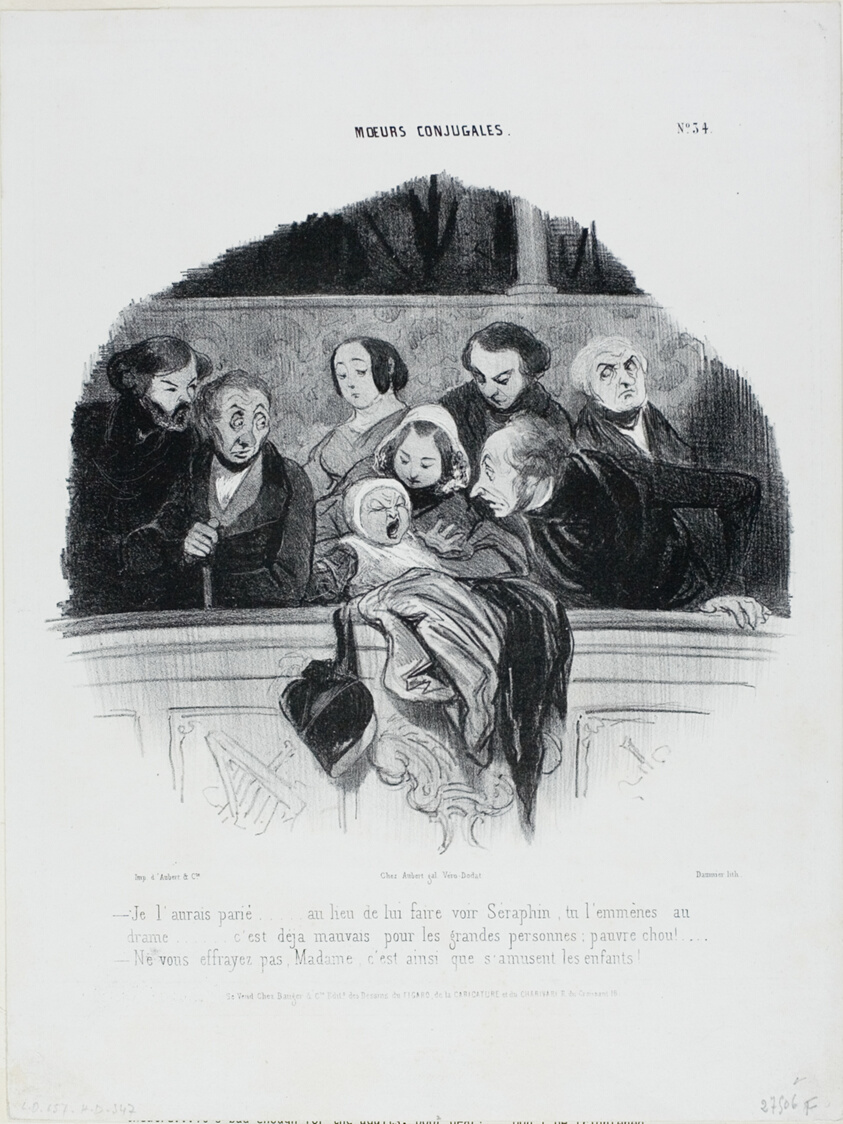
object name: Print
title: “- I would have bet on it… instead of taking him to see Séraphin you take him to a drama.... it's bad enough for adults already, poor little thing!... - Don't worry Madame, this is the way children are enjoying themselves,” plate 34 from Moeurs Conjugales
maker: Honoré Victorin Daumier; French, 1808-1879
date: 1841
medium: Lithograph in black on white wove paper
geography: France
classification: lithograph; print; prints and drawing